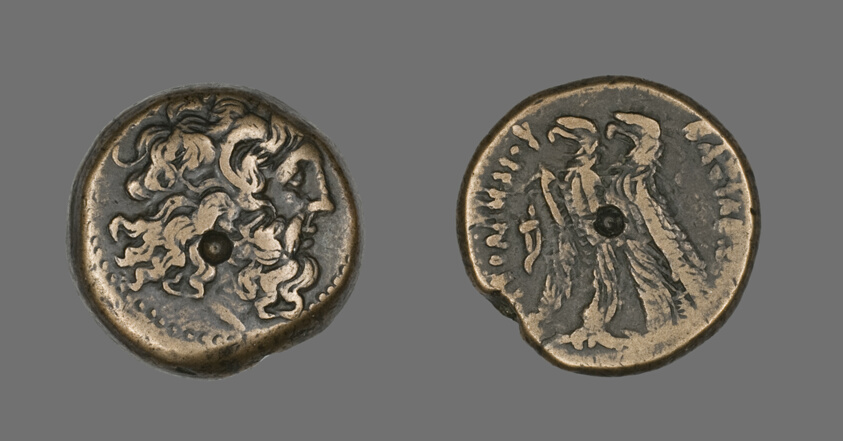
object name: Coin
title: Coin Depicting the God Zeus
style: ptolemaic, greco-roman (egyptian)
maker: Greek, Ptolemaic; minted in Egypt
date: 117-111 BCE, issued by Ptolemy X (Soter II)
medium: Copper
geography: Egypt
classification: coin; ancient art; struck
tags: zeus, eagles